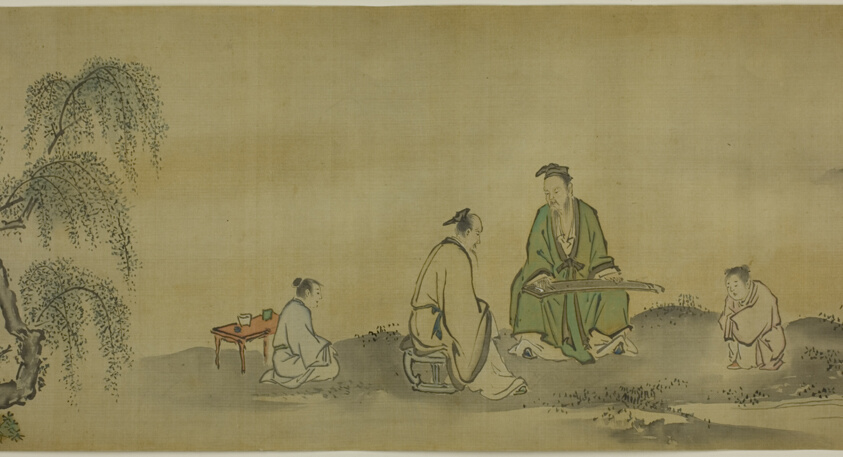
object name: Painting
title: The Four Accomplishments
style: Japanese (culture or style)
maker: Kano Tsunenobu; Japanese, 1636-1713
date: c. 1700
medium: Ink and colors on silk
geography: Japan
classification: handscroll; painting; asian art